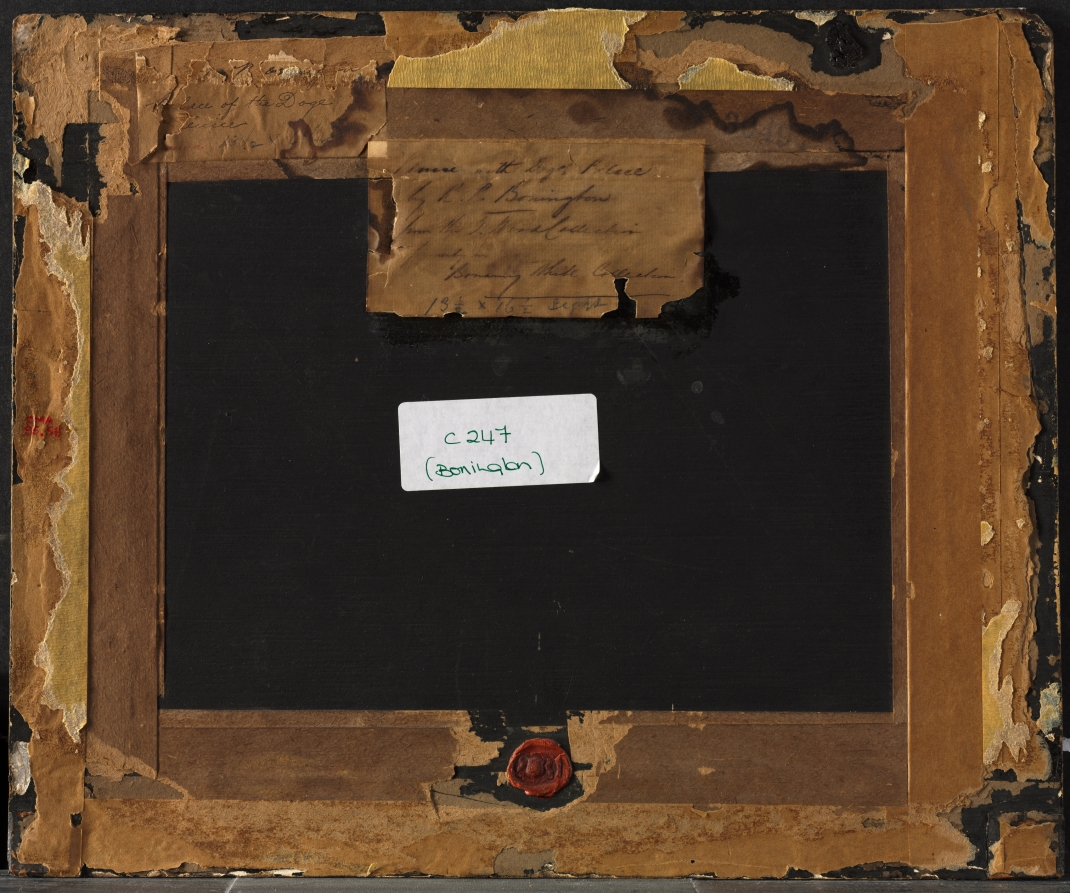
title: The Doge's Palace, Venice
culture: England, 19th century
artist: Richard Parkes Bonington (British, 1802–1828)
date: 1826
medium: oil on millboard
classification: Painting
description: At the age of 22, Bonington achieved overnight success at the official (state sponsored) Paris exhibition known as Salon. Two years later, in 1826, he journeyed to Venice, a city that had long attracted landscape artists. At first, constant rain greatly depressed Bonington, but suddenly the weather changed and Venice was at its glorious best. Bonington frequently painted outdoors, capturing immediate impressions of Venetian architecture and sunlight. He made this particular study from a boat anchored in the lagoon near the Doge's Palace. The thick swirls of paint, with colors mixed together while still wet, indicates how rapidly the artist worked.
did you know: At age seventeen, Bonington began teaching precision drawing at the École des Beaux Arts in Paris and he was essential to bringing aspects of the English style to France.